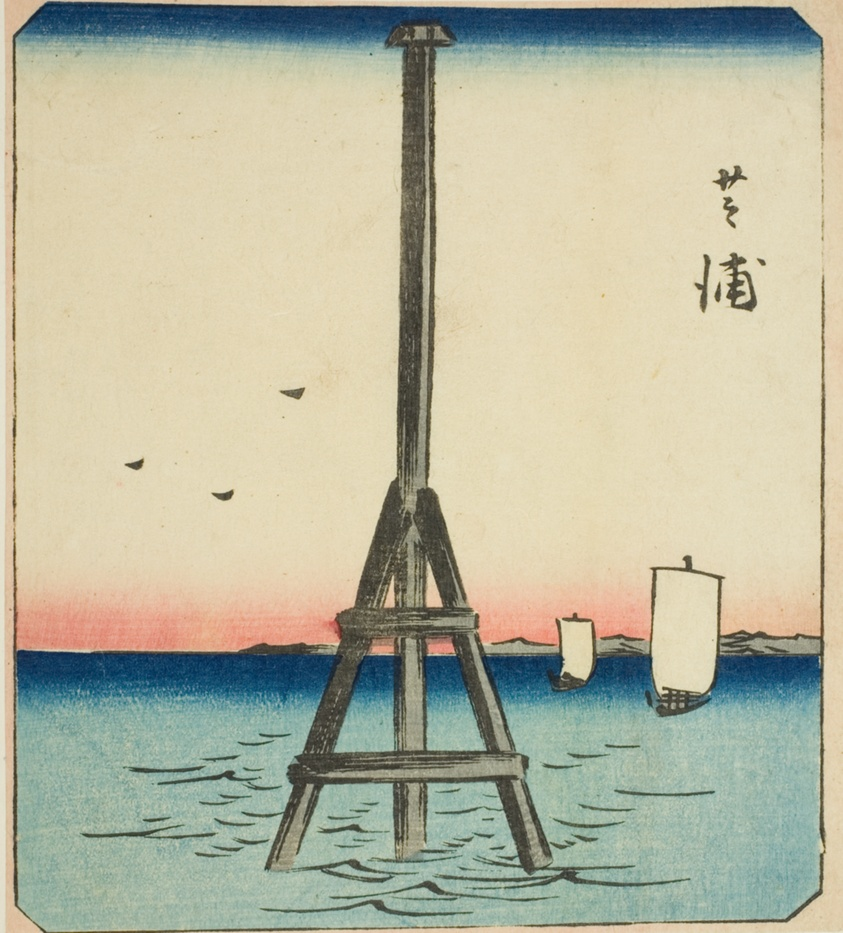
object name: Print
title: Shibaura, section of a sheet from the series series "Cutout Pictures of Famous Places in Edo (Edo meisho harimaze zue)"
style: Japanese (culture or style)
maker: Utagawa Hiroshige 歌川 広重; Japanese, 1797-1858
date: 1857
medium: Color woodblock print; section of harimaze sheet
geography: Japan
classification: woodblock print; print; asian art